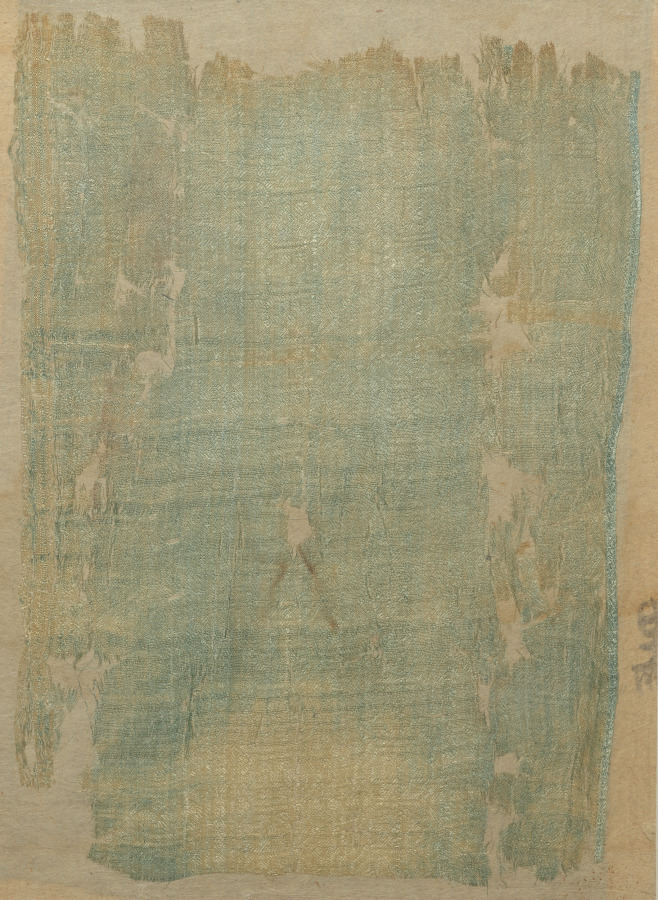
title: Fragment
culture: China, 8th century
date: 700s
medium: patterned tabby weave; silk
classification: Textile